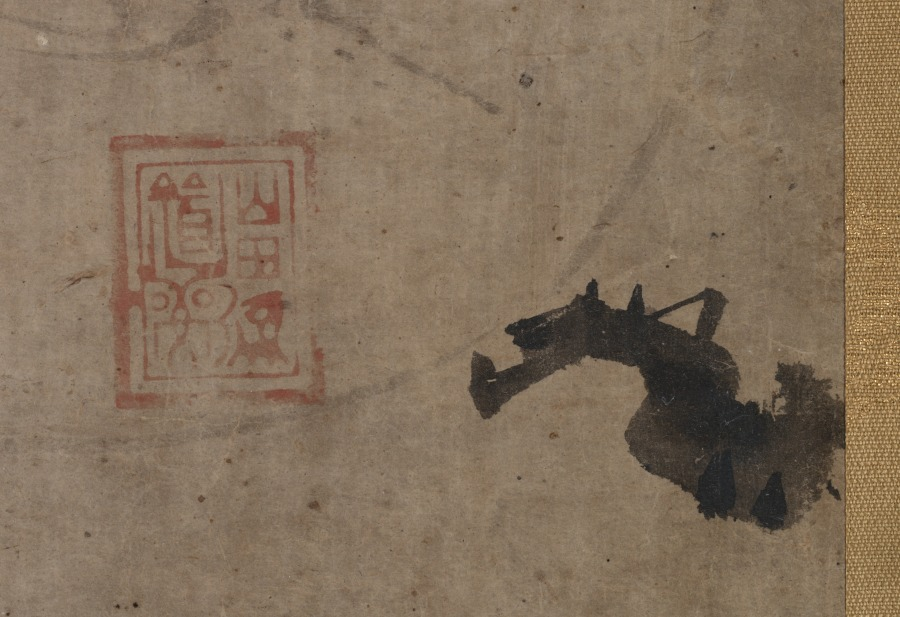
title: Hotei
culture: Japan, Muromachi period (1392–1573)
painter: Yamada Dōan I (Juntei) (Japanese, d. 1573)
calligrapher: Tōkei Jakurin (Japanese, dates unknown)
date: mid-1500s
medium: hanging scroll; ink on paper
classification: Painting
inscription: 桃渓道人 題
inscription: 大肚兮濶襟 寶聚嚢底沵 通霄別有路 勿向指尖尋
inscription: 落款 桃渓之印 若霖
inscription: 印章 山田氏道安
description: Hotei is a semilegendary figure who may have lived from the late 800s to the early 900s. He later became prominent in Chan (or Zen, in Japanese) Buddhist literature. He epitomizes the freewheeling figure outside the mainstream monastic system—in which people strive for enlightenment through prescribed methods—who nonetheless attains a high level of spiritual awakening. The inscription warns against seeking enlightenment by conscious effort: Big stomach, gaping garment, Treasures gathered deep in the bottom of his bag, Passing through the sky is another road, Do not seek that to which his fingertip points.